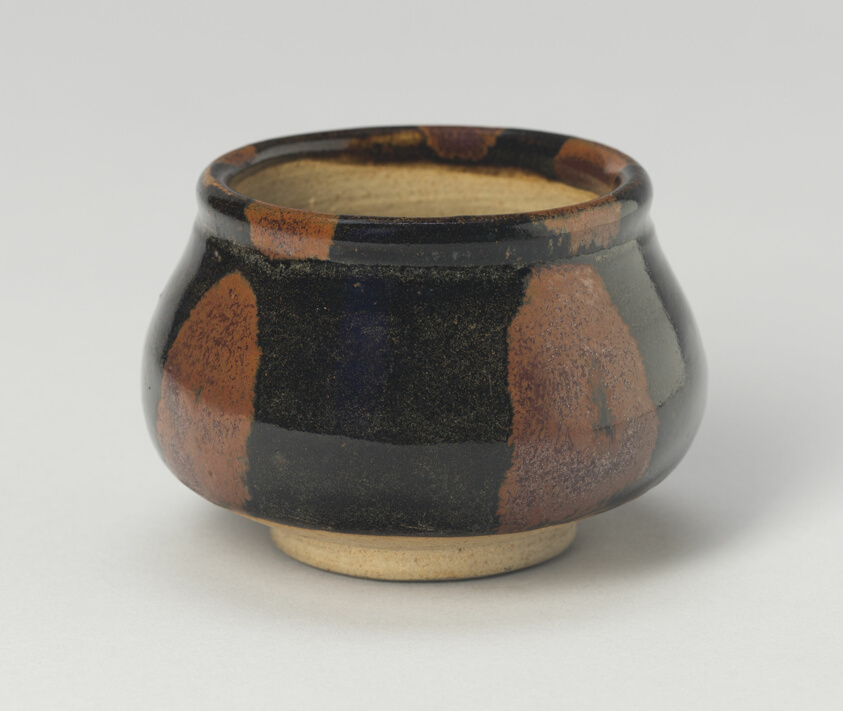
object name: Vessel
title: Small Wide-Mouthed Jar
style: Chinese (culture or style)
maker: China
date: Northern Song (960–1127) or Jin dynasty (1115–1234), c. 12th century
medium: Northern blackware, Cizhou type; stoneware with russet-streaked dark brown glaze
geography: China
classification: ceramics; vessel